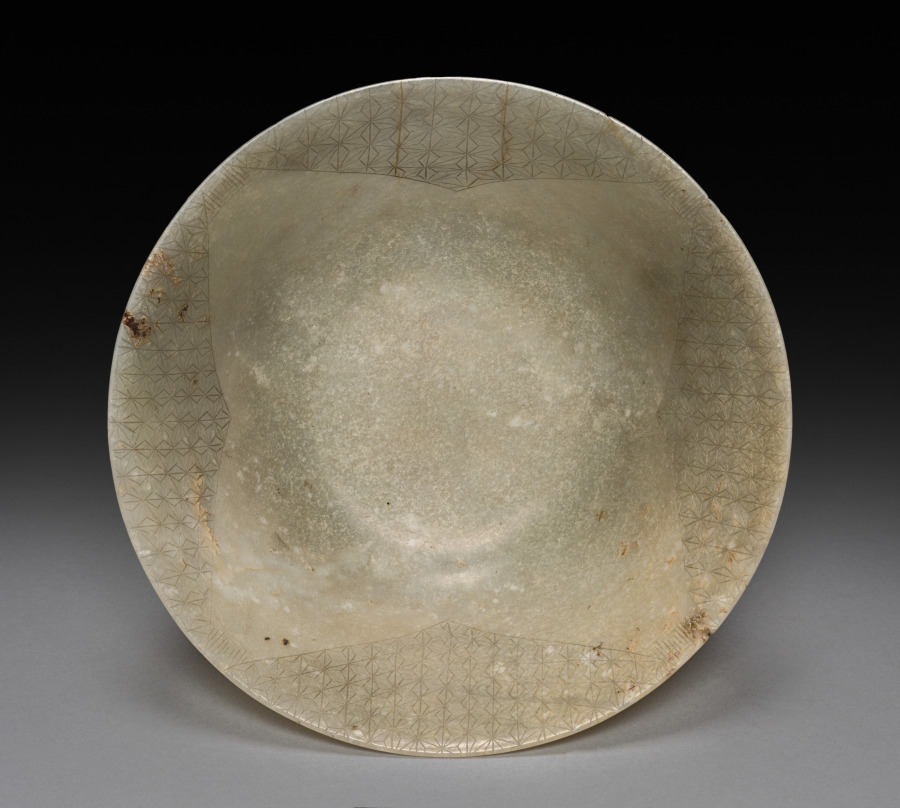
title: Bowl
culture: China, Qing dynasty (1644-1911), Kangxi reign (1661-1722)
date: 1662–1722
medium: jade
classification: Jade